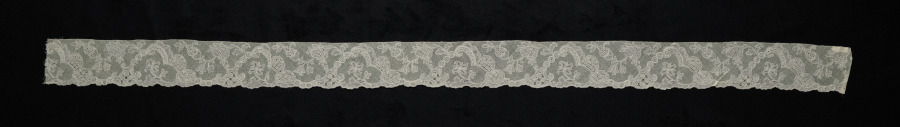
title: Lace Edging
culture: Belgium, Mechelen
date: 1700s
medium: Bobbin lace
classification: Lace